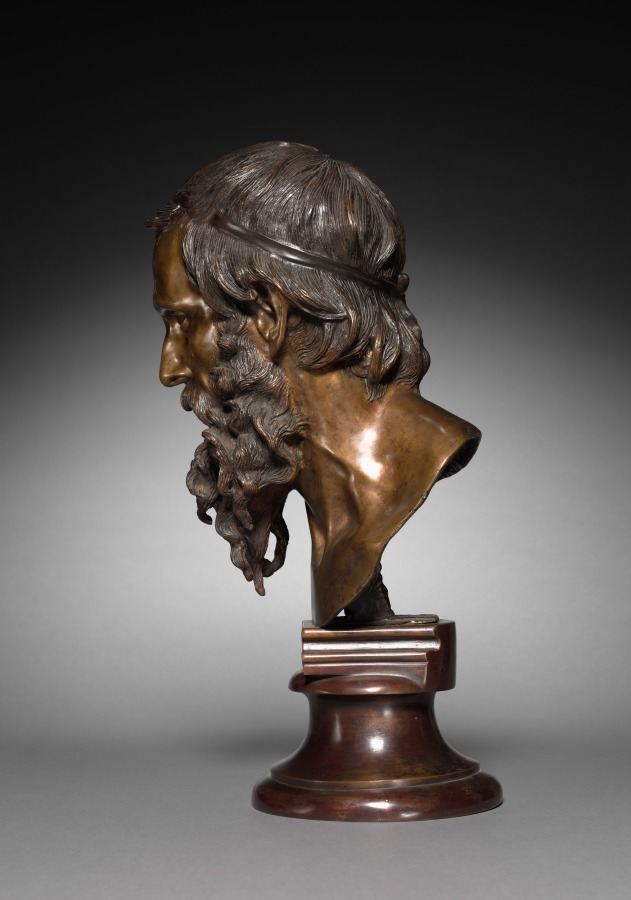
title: Head of a Philosopher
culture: Italy, 19th century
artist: Vincenzo Gemito (Italian, 1852–1929)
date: 1883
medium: bronze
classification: Sculpture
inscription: Signed: "Gemito"; stamped: "FONDERIA GEMITO NAPOLI"